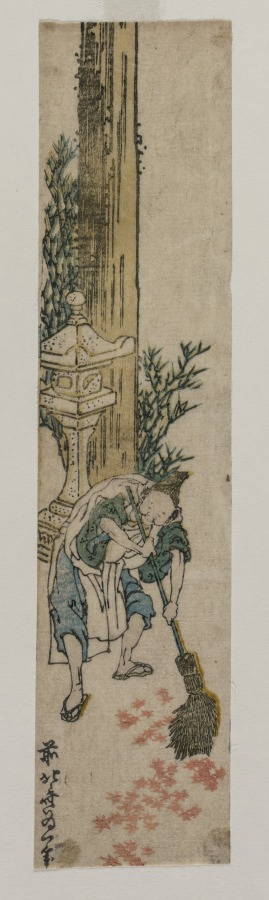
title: Shrine Attendant Raking Maple Leaves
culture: Japan, Edo period (1615–1868)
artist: Katsushika Hokusai (Japanese, 1760–1849)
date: c. 1830 or early 1830s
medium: color woodblock print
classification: Print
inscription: Signature: Zen Hokusai Iitsu hitsu Publisher: Moriya Jisuke (emblem)